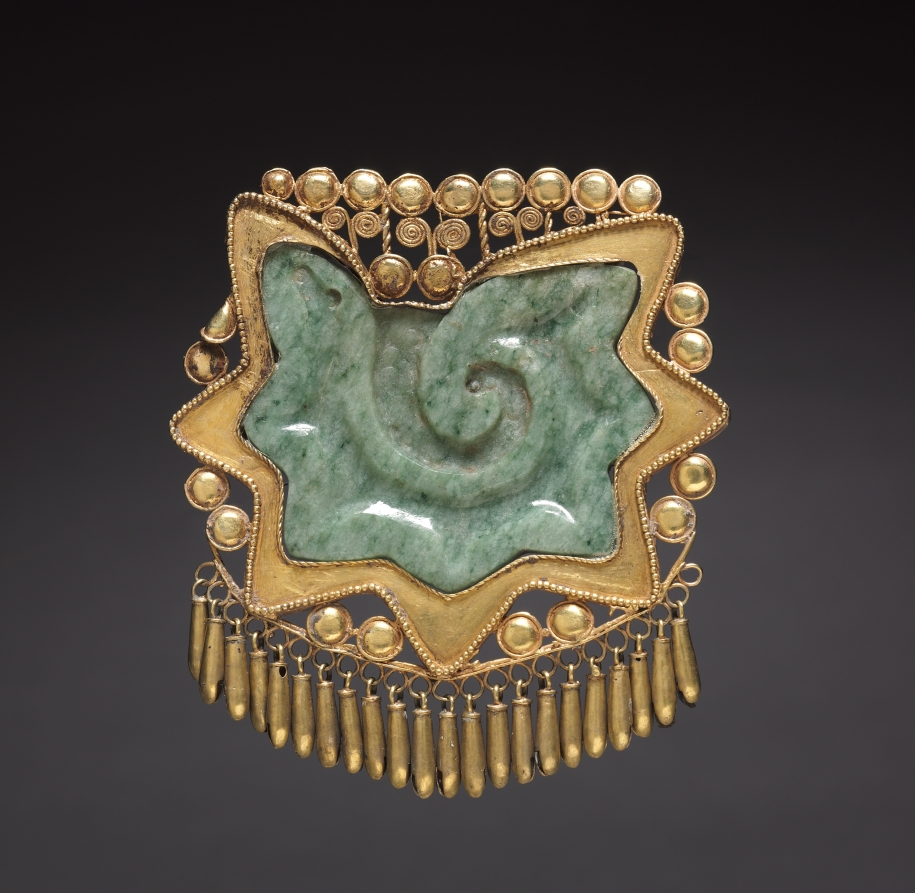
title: Pectoral Ornament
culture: Mexico, Guerrero, Ichcatiopan, Mixtec or Aztec style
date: c. 1200–1519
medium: gold, jadeite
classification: Jewelry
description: This extraordinary pendant consists of a conch shell section carved in jade, enclosed in a delicate gold frame with tiny dangling bells. This symbol was worn by the deity Quetzalcoatl (Feathered Serpent), a culture hero credited in one myth with creating human life by sprinkling his blood on ground bones. The pectoral may have been worn by a priest, or by a ceremonial impersonator of Quetzalcoatl.